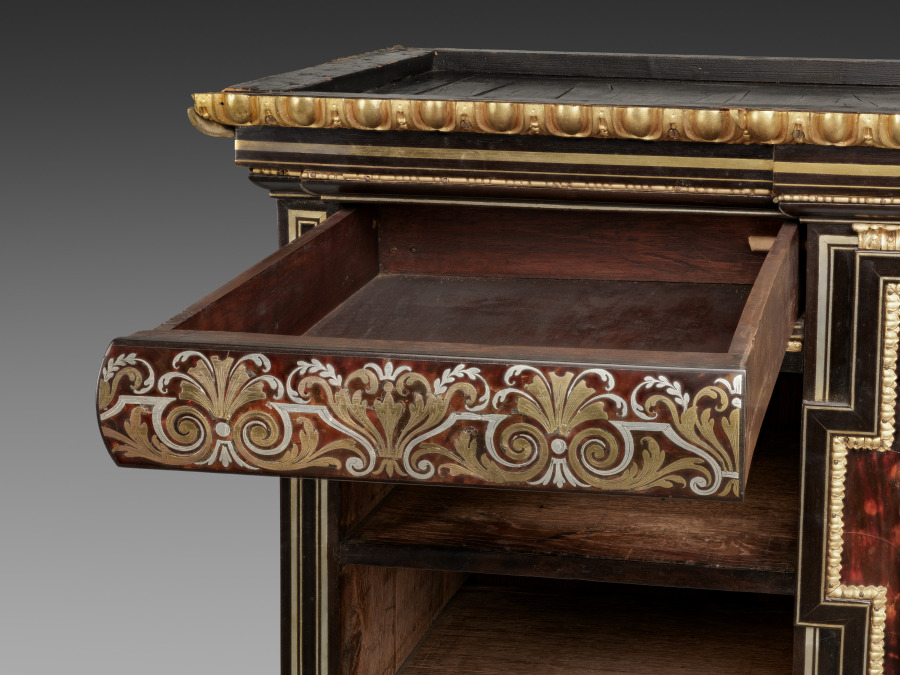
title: Drawer for Cabinet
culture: France, late 17th Century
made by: André-Charles Boulle (French, 1642–1732)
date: c. 1690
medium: ebony, marquetry in metal and tortoiseshell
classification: Furniture and woodwork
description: Appointed cabinetmaker to King Louis XIV in 1672, André-Charles Boulle became a master of furniture making in France during the late 1600s until his death in 1732. Known primarily for his use of marquetry, in which metal patterns are inlaid into tortoiseshell then applied within the veneered surface of the furniture, Boulle established a level of quality and craftsmanship few others could achieve. As a result, his work found favor at the royal court and among other aristocrats and diplomats eager to impress the king. The inclusion of a medallion depicting Louis XIV within the bronze decoration of this chest would have identified the owner with the royal court. Often exhibiting stout architectural proportions with elegant groups of inlaid motifs such as the parrot on the central panel of this chest, Boulle’s designs are an example of the intellectual fashion for contrasting ideas, materials, and motifs.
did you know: Originally designed to sit atop an elaborate tall stand, this chest was likely altered in the late 1700s to reduce its scale and height.